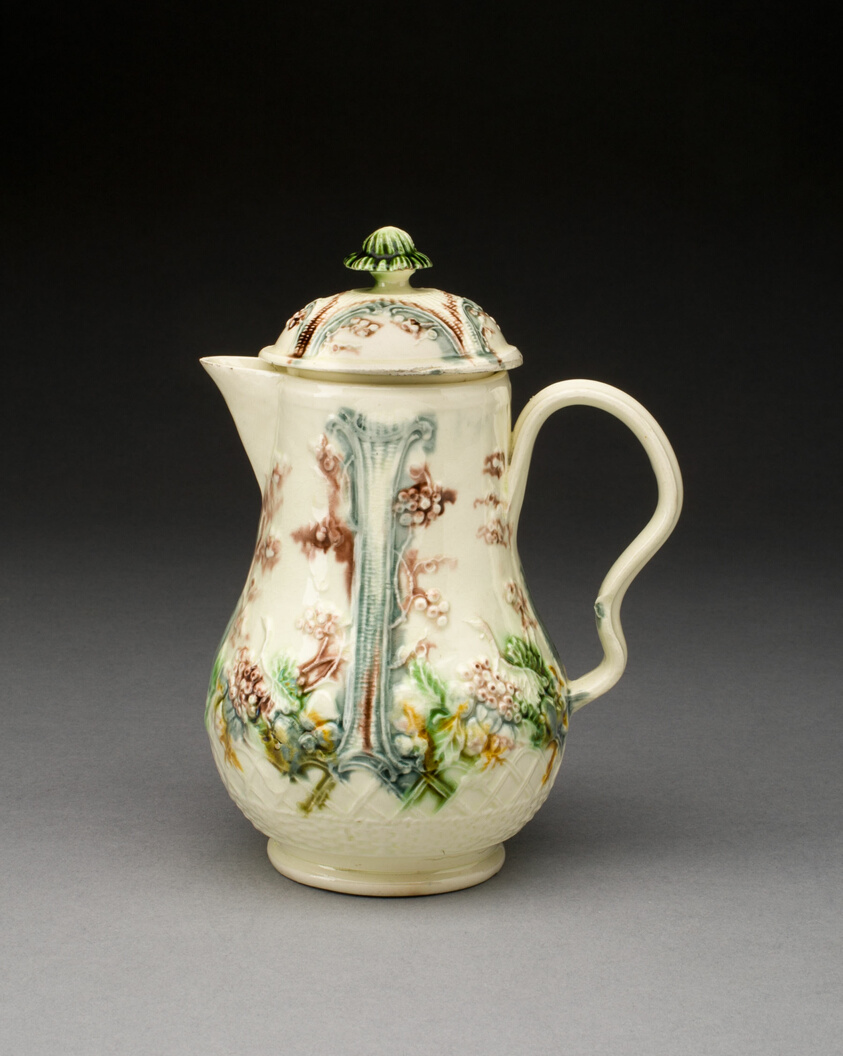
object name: Ceramics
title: Covered Milk Jug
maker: England, Staffordshire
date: 1760/69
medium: Lead-glazed earthenware (creamware)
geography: Staffordshire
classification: earthenware; european decorative arts; creamware; ceramics; lead-glazed earthenware